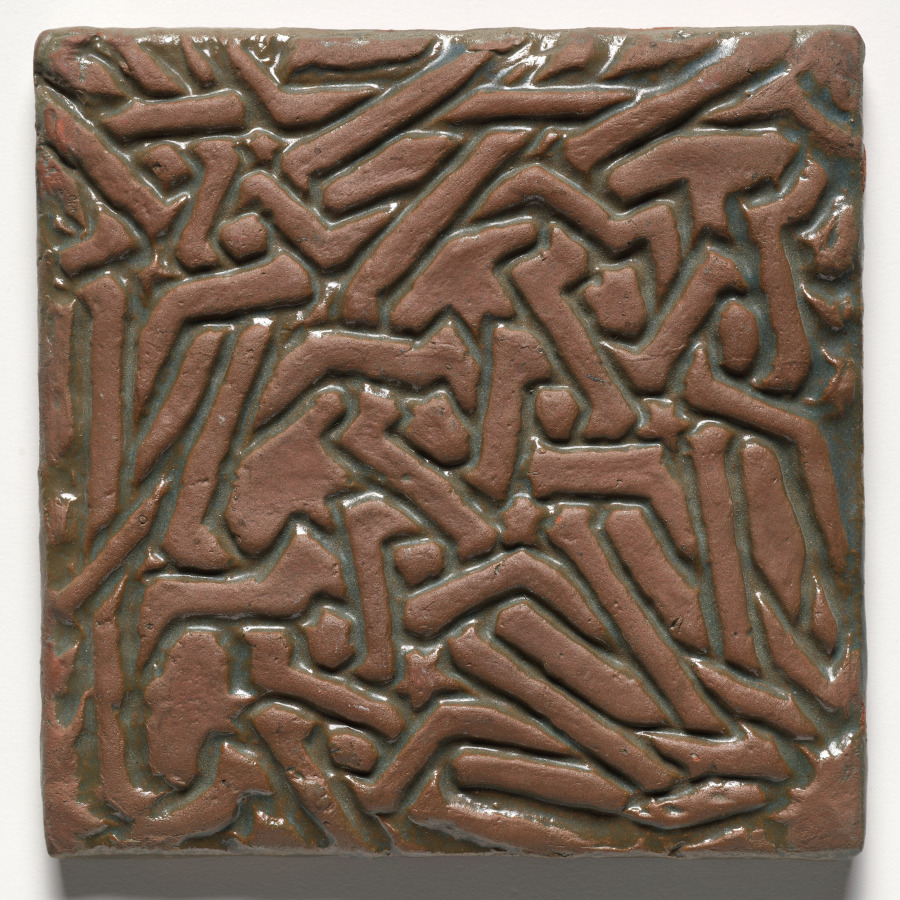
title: Tile- Islamic Pattern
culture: America, Pennsylvania, Doylestown, Early 20th century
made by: Moravian Pottery and Tile Works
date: before 1921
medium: glazed ceramic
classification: Ceramic